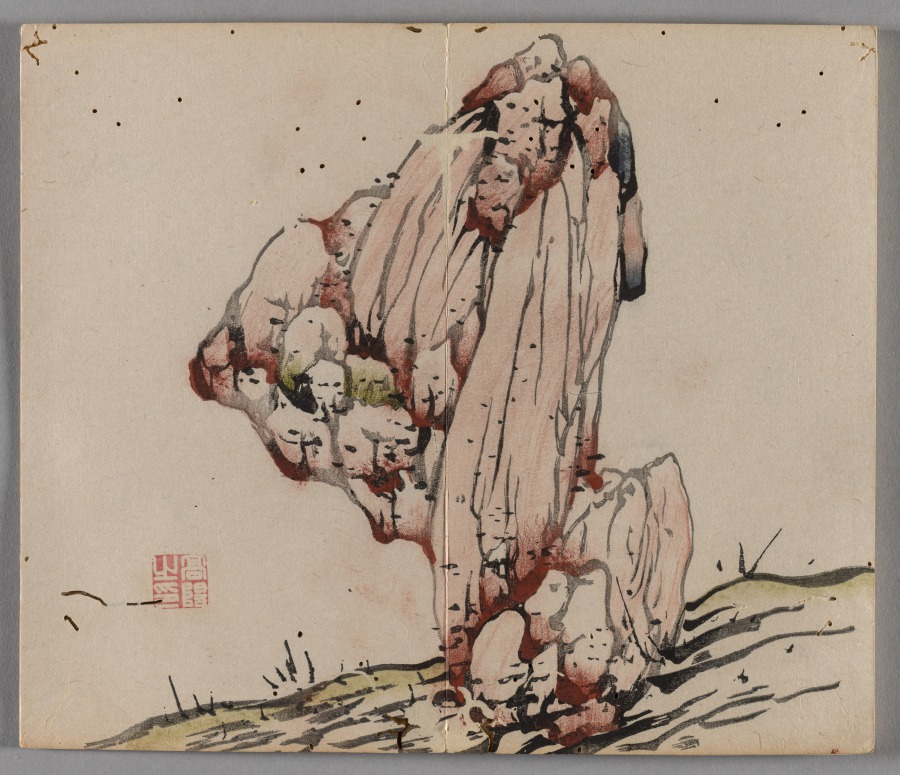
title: Ten Bamboo Studio Painting and Calligraphy Handbook (Shizhuzhai shuhua pu): Rocks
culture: China, Qing dynasty (1644-1911)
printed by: Hu Zhengyan (Chinese, c. 1584–1674)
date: 1633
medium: Woodblock-printed book; ink and colors on paper; first edition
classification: Print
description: Color printing reached a level of perfection in the early 1600s, as seen in this Ten Bamboo Studio Collection of Calligraphy and Painting and the Mustard Seed Garden Manual of Painting (printed 1679 and 1701). The painterly quality, precision in registering (aligning) the woodblocks, and harmonious colors made them the most successful color print editions in Chinese history. Both editions were printed and compiled in Nanjing, spread nationwide, and had a great impact on the arts in Japan and Korea.